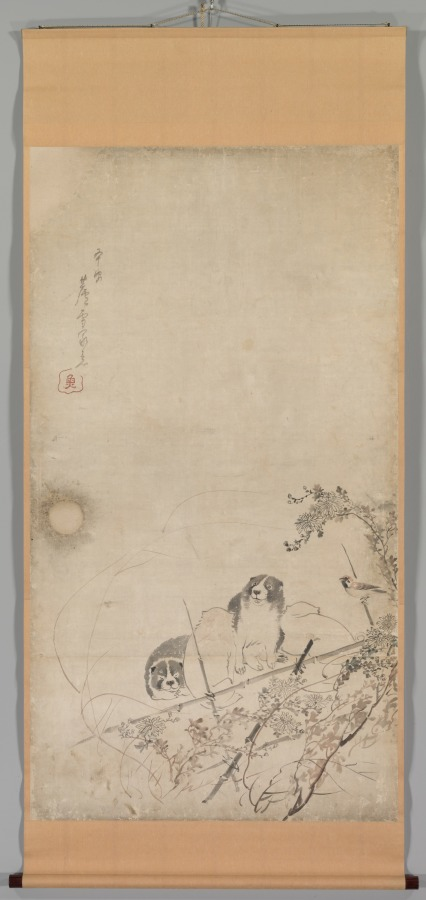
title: Puppies, Sparrows, and Chrysanthemums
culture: Japan, Edo period (1615–1868)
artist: Nagasawa Rosetsu (Japanese, 1754–1799)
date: c. 1792–94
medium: Fusuma panel remounted as a hanging scroll; ink and slight color on paper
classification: Painting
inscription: Signature and seal of artist upper left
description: These paintings were originally mounted as sliding doors (fusuma) used inside a building. The circular areas on the paintings’ paper surfaces are traces of the former positions of the door pulls (hikite). A flock of sparrows gathers on a trellis supporting flowering chrysanthemum. Below is a litter of puppies, some cavorting, others napping. The tender story created by the curious puppy peering up and tilting its head to listen to the bird’s insistent call in the leftmost part of the composition is characteristic of Nagasawa Rosetsu’s paintings, which often use animals to illustrate the human condition.